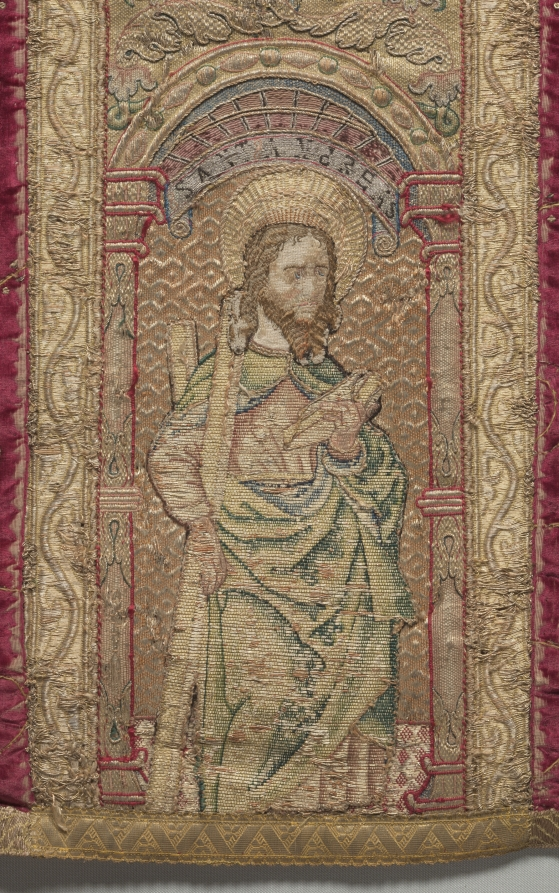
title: Chasuble with Orphrey Band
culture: England, London (embroidery) and Italy, Florence (velvet), early 16th century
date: 1500–1520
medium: Silk, gold thread, sequins; appliqué, embroidery: couching stitches Velvet: solid pile, silk; embroidery: or nué (shaded gold)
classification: Embroidery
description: The English adopted a simpler style of embroidering vestments suitable for mass production around 1500. Isolated motifs, often floral, were embroidered on plain velvet, as in this ecclesiastical chasuble. The orphrey, or embroidered band, in the center depicts Saints Peter, John the Evangelist, and Andrew, identified by their names and attributes (top to bottom). Most of the surface is covered with gold thread sewn down by silk thread passing over it in different densities to create the effect of modeling. Silk thread was also used to embroider areas of skin and hair (mostly disintegrated).